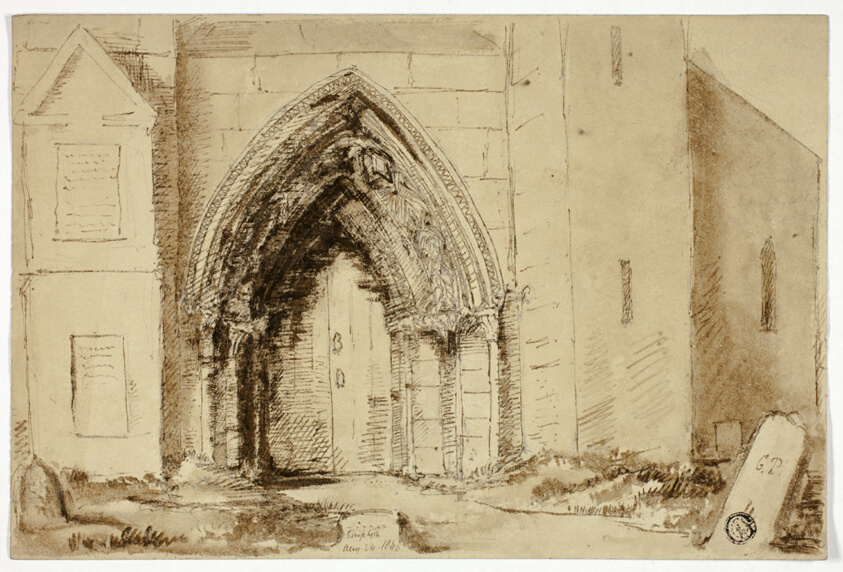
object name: Drawing and Watercolor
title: Gothic Church Portal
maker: Unknown artist (United Kingdom, 19th century)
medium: Pen and brown ink, with brush and brown wash, and touches of graphite, on cream wove paper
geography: United Kingdom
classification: pen and ink drawings; drawings (visual works); prints and drawing